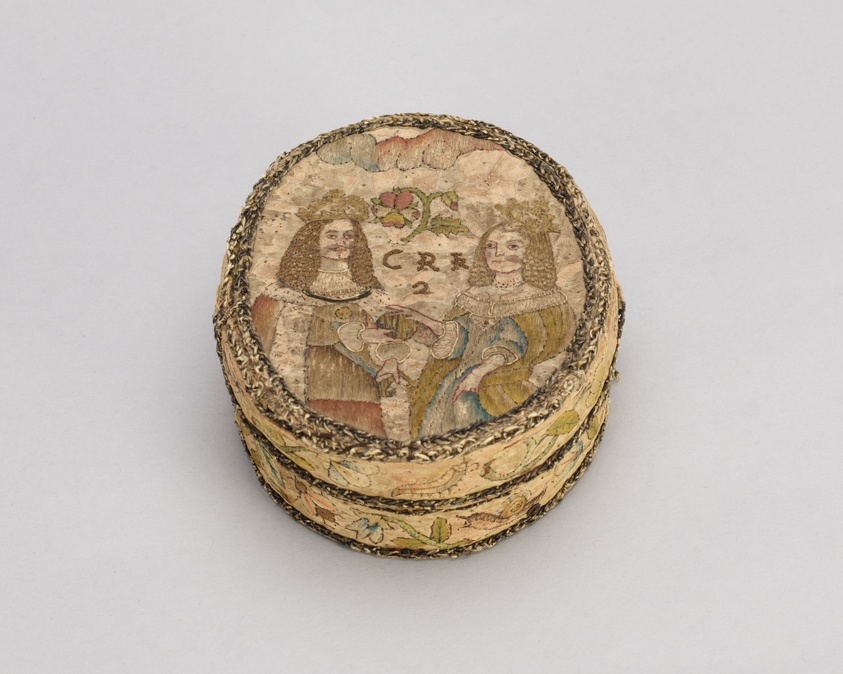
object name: Textile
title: Oval Box Showing Charles II and Catherine of Braganza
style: 17th Century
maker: England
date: c. 1660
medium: Silk, plain weave; embroidered with silk floss foremost in satin stitch; French knots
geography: England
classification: needlework (visual works); textile; portrait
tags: portrait, coat of arms, royalty, crowns, robes, dresses, foliage, snail, butterflies, flowers, botanical/floral, insects